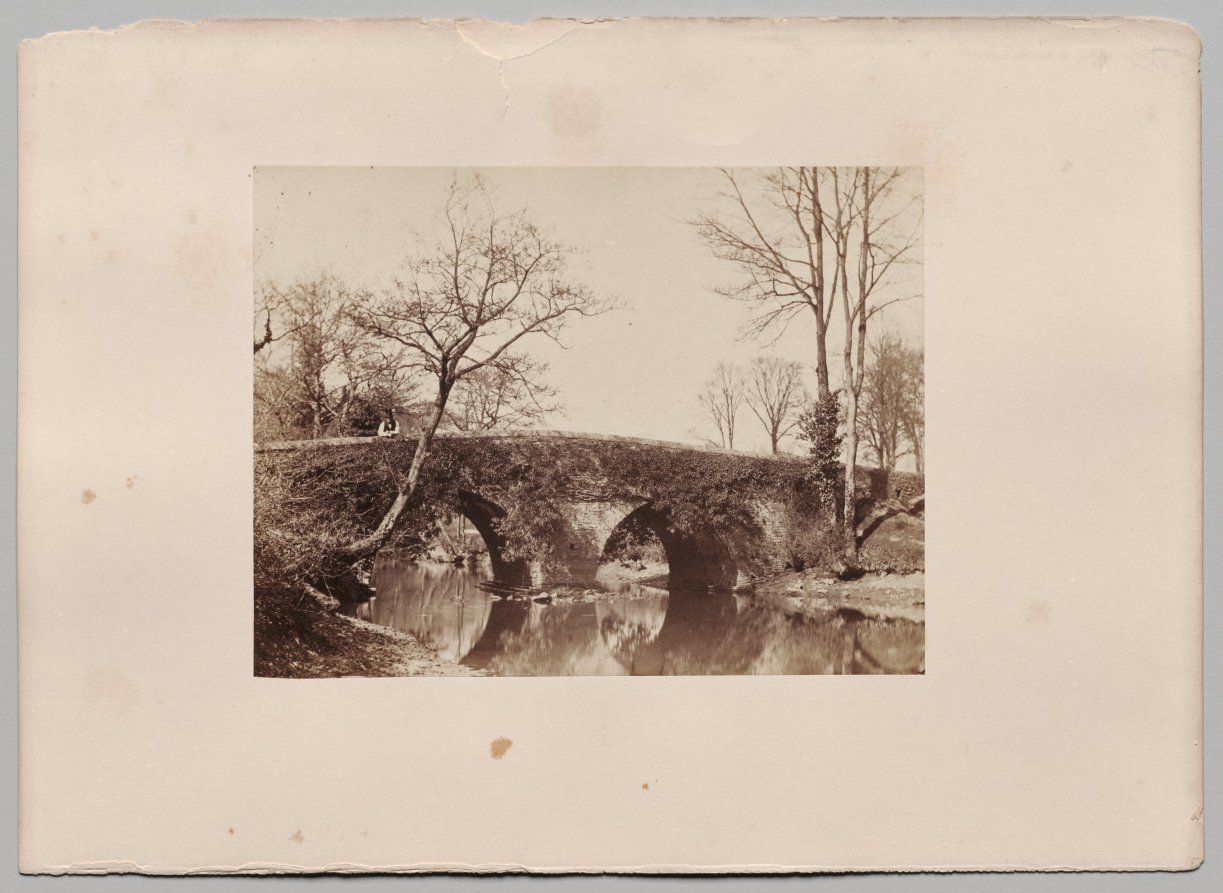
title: The Country Bridge (Staplylton Bridge, Bristol)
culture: England, 19th century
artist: John Dillwyn Llewelyn (British, 1810–1882)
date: c. 1854– 1857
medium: albumen print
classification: Photograph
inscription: written in pencil on verso of mount: "13838-4.09/The Country Bridge/John Dillwyn Llewelyn"